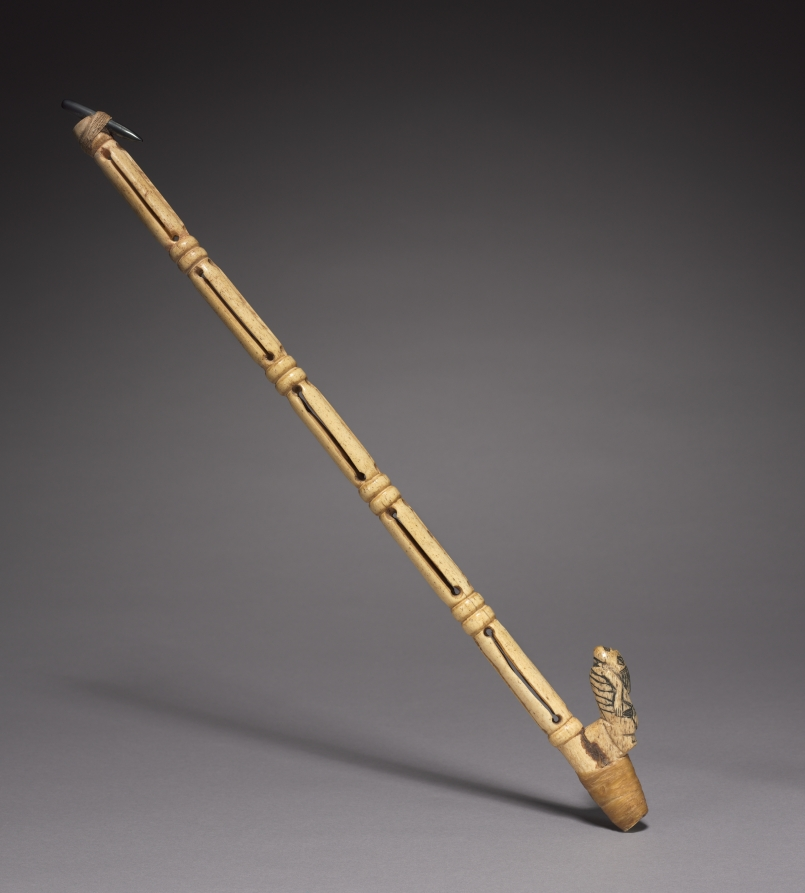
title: Spear Thrower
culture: Peru, South Coast, late Paracas or early Nasca style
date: 200 BCE–200 CE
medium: bone, hematite, cotton thread, sinew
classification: Arms and Armor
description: Spear throwers improve a spear's range and thrust. The spear was placed against the stone pivot and hurled using the thumb rest, carved as a figure with a skeletal chest, back-bent head, and a severed human head at its rear. This figure, frequent in art, is not well understood, but its appearance here suggests a connection to death. The shaft's carving makes clever use of the bone's marrow cavity.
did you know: Spear throwers, also called atlatls, use leverage to propel a spear faster and farther through the air.